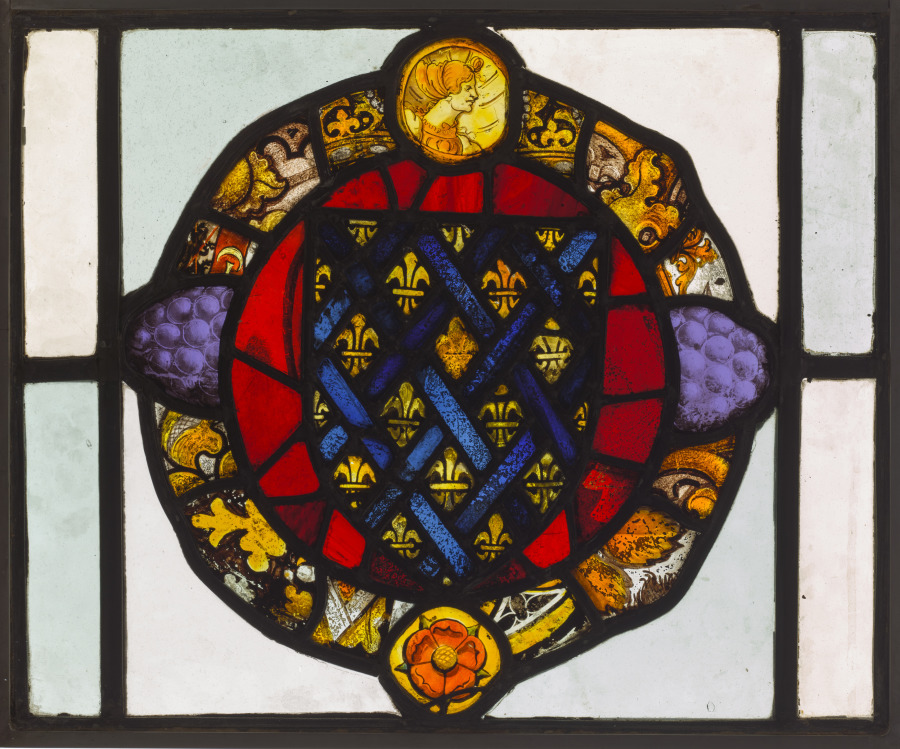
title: Panel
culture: England, 16th century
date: 1500s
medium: pot-metal and white glass, silver stain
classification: Glass